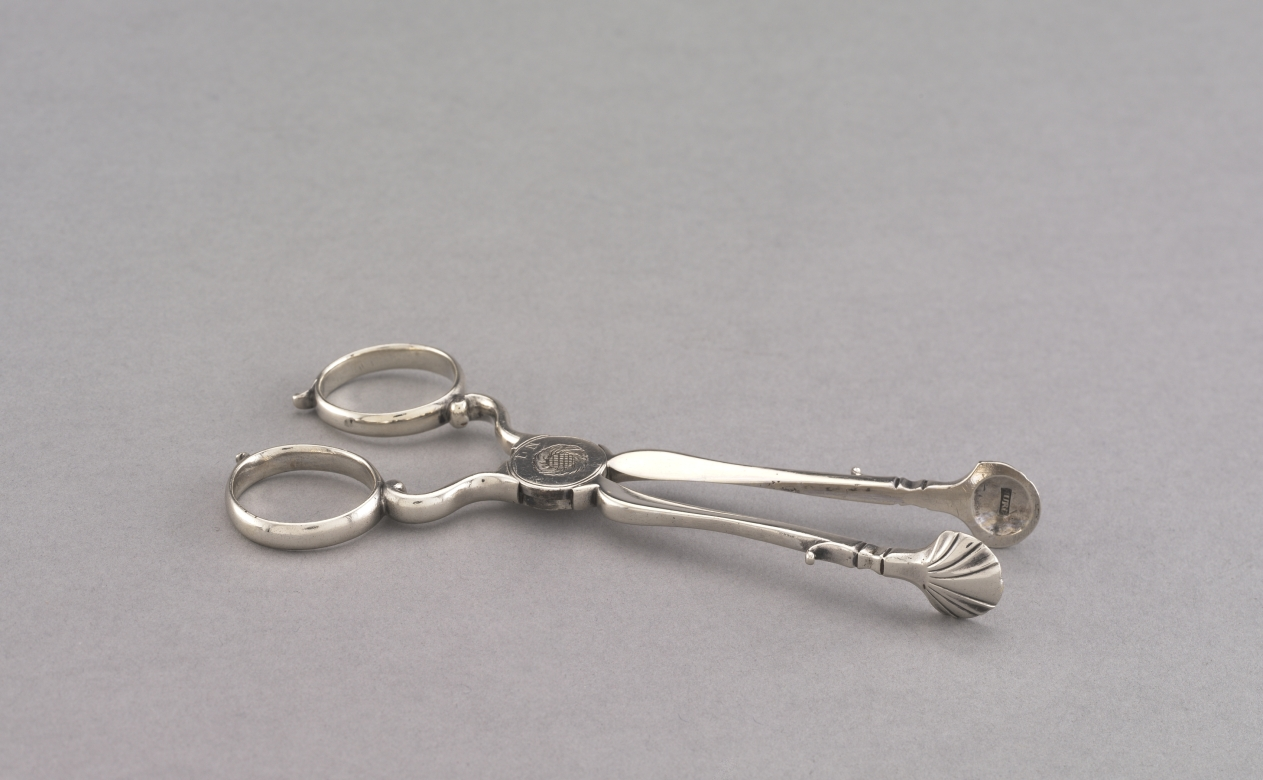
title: Sugar Scissors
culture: America, Massachusetts, Boston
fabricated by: Jacob Hurd (American, 1702–1758)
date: c. 1750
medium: silver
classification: Silver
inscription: engraved: NL in block letters below engraved flower on pivot.